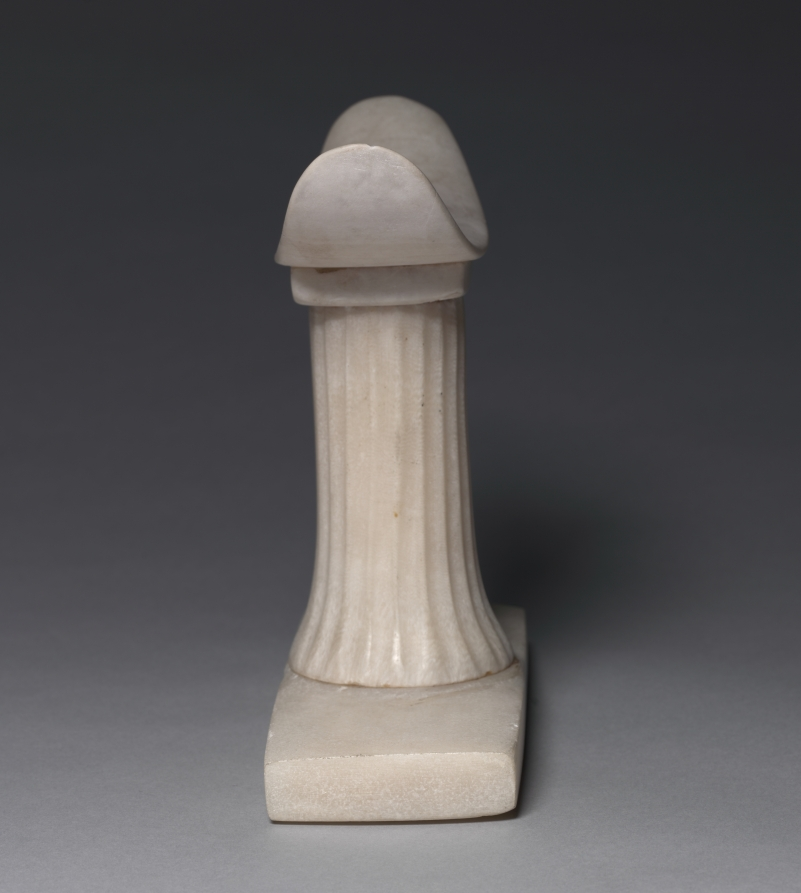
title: Headrest of Irut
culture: Egypt, Old Kingdom (2647–2124 BCE), Dynasties 5–6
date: c. 2454–2140 BCE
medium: travertine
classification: Funerary Equipment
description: The ancient Egyptians used wooden headrests as pillows. Stone headrests were replicas made for the tomb. This example is inscribed on the top of the supporting column for "the king’s noblewoman, Irut."